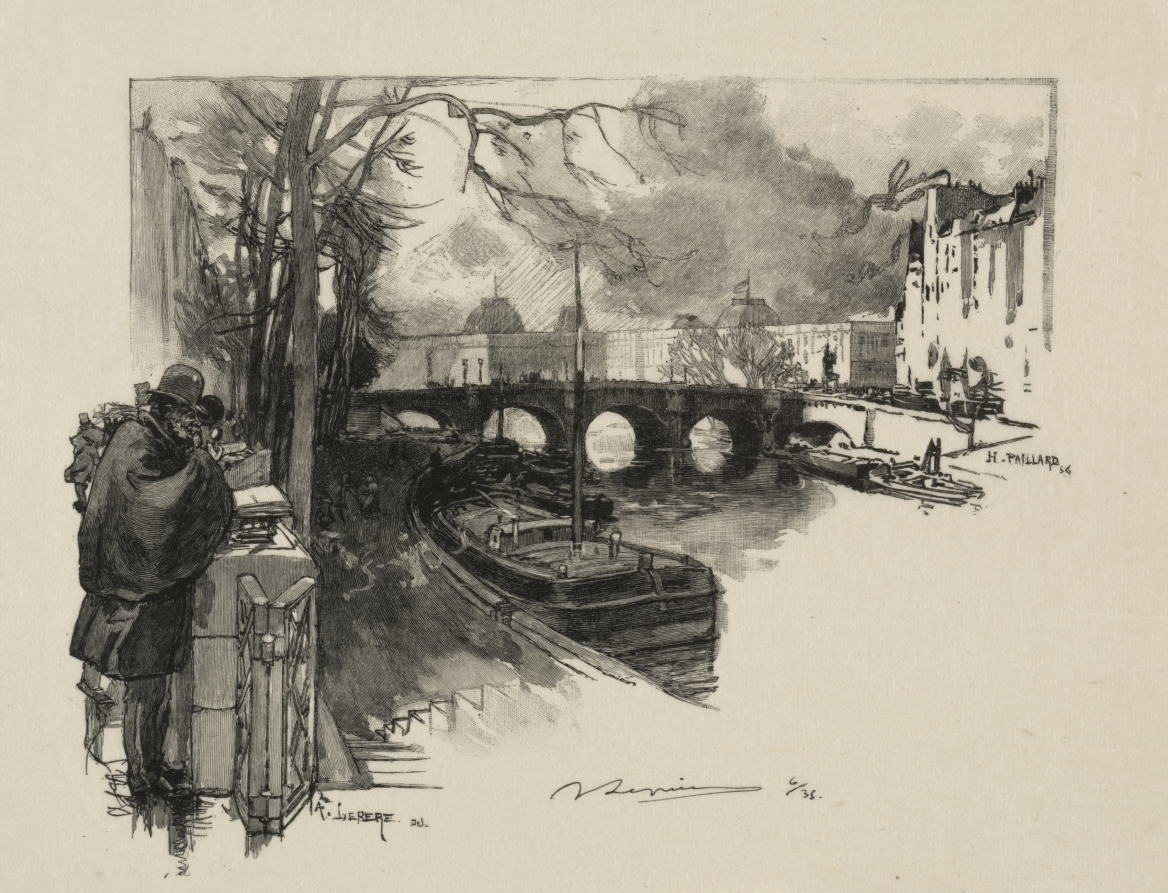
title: Petit bras de Seine au Pont Neuf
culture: France, 19th-20th century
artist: Auguste Louis Lepère (French, 1849–1918)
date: 1888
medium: wood engraving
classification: Print